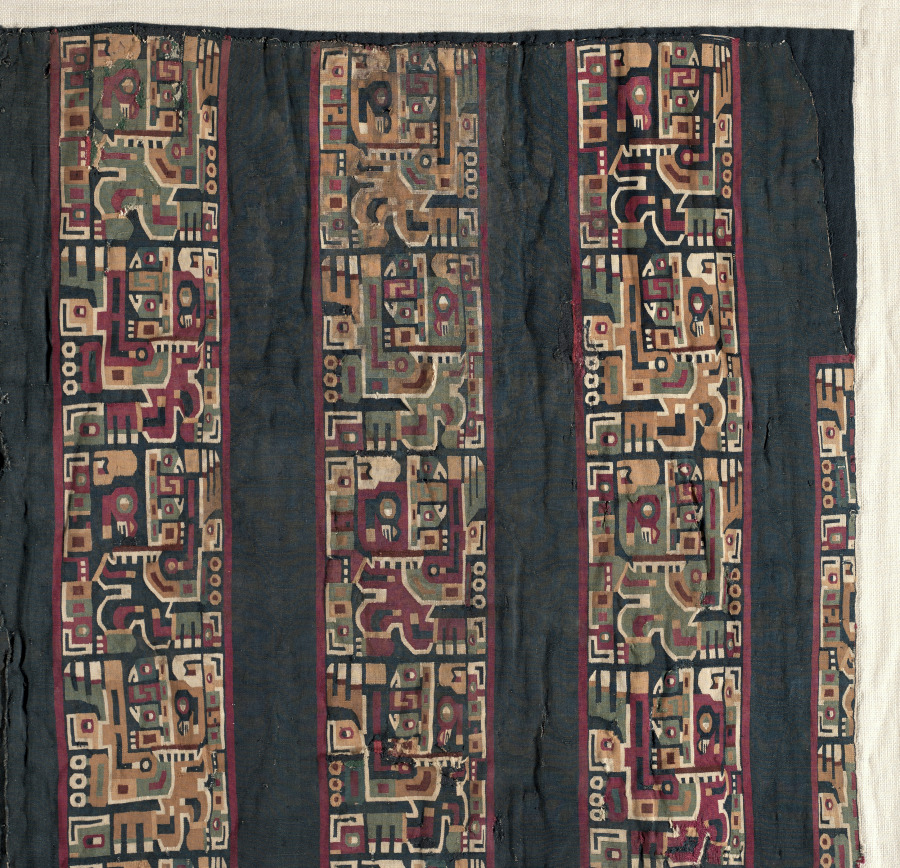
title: Half of a Sleeved Tunic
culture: Central Andes, Middle Horizon, Wari, 6th-11th century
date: c. 500–1000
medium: single-interlocked tapestry; cotton warp; camelid fiber weft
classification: Textile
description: The bird-headed creature in profile that repeats in each of this tunic's design fields gazes upward, holds a staff of authority in front of its body, and wears an ornate headdress behind which a three-feathered wing can be seen. The extremely high technical quality of such tunics suggests that the Wari reserved bird imagery for their most exalted rulers. Here, the original incorporated more than twice as much yarn as the routine--some 19 miles, all handmade and much dyed an inky, dark blue, the most prestigious of Wari colors.